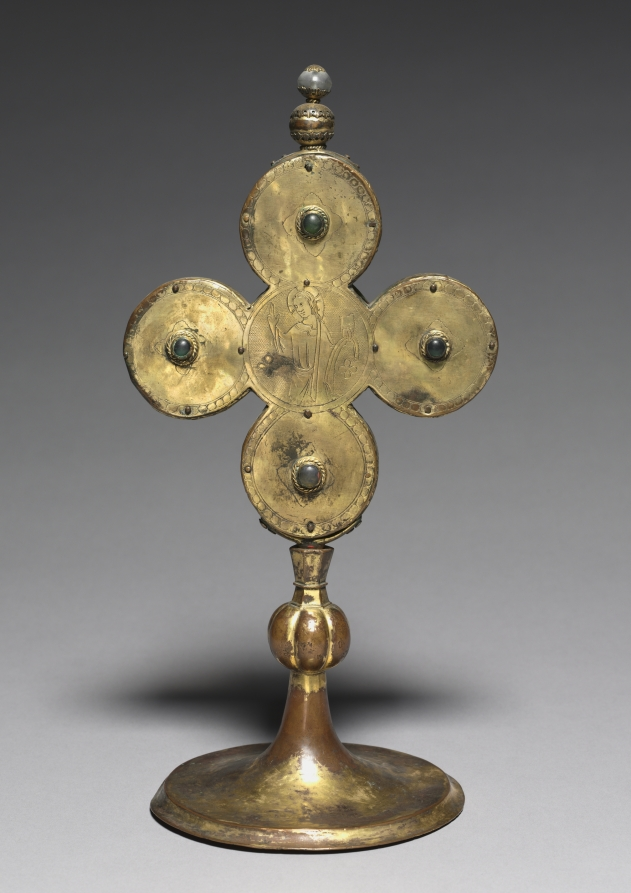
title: Reliquary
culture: France, Gothic period, 13th century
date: 1200–1300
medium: copper: gilded, engraved; rock crystal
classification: Metalwork